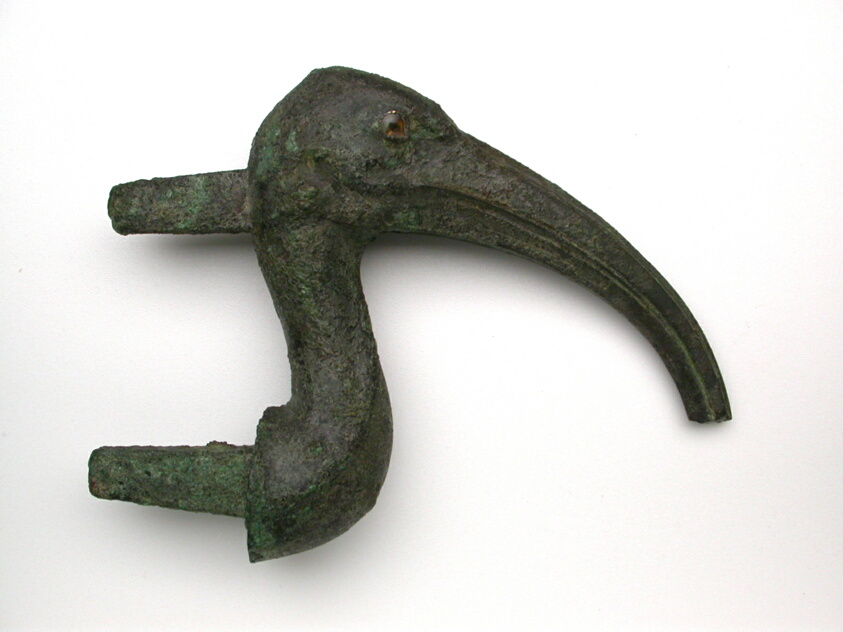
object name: Sculpture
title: Statuette of an Ibis Head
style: egyptian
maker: Egyptian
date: Late Period (664–332 BCE)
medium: Bronze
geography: Egypt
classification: statuette; bronze; metal; sculpture; ancient art